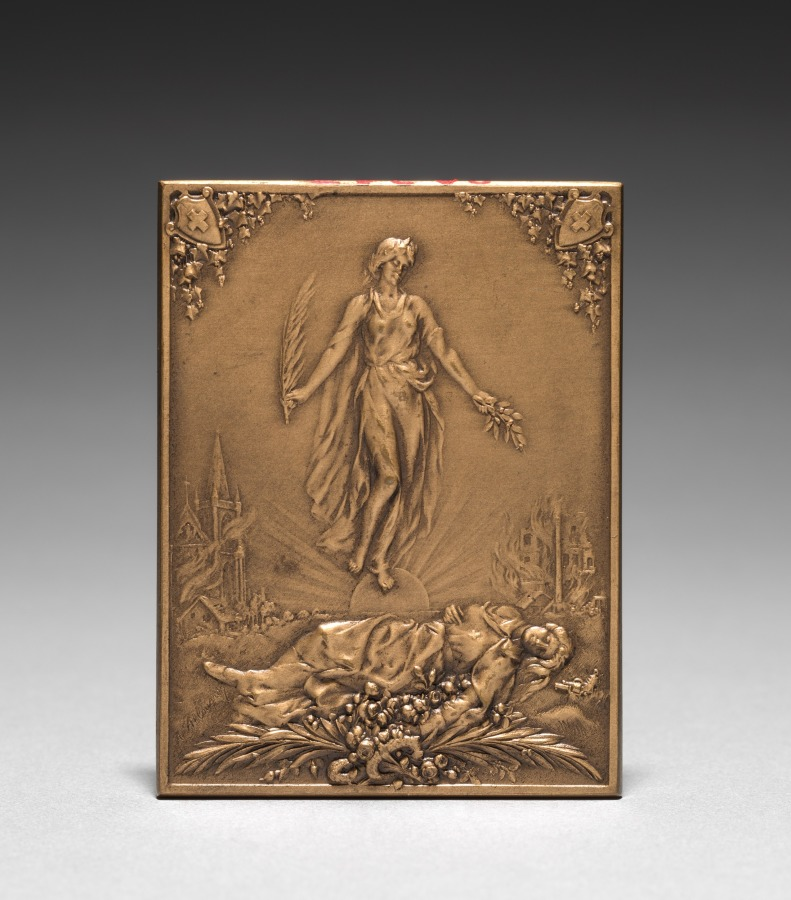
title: Medallion (obverse)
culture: France, 19th-20th century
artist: Henri Emile Allouard (French, 1844–1929)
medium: bronze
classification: Metalwork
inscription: "Aux dames de la Croix rouge. Virtus Caritas."